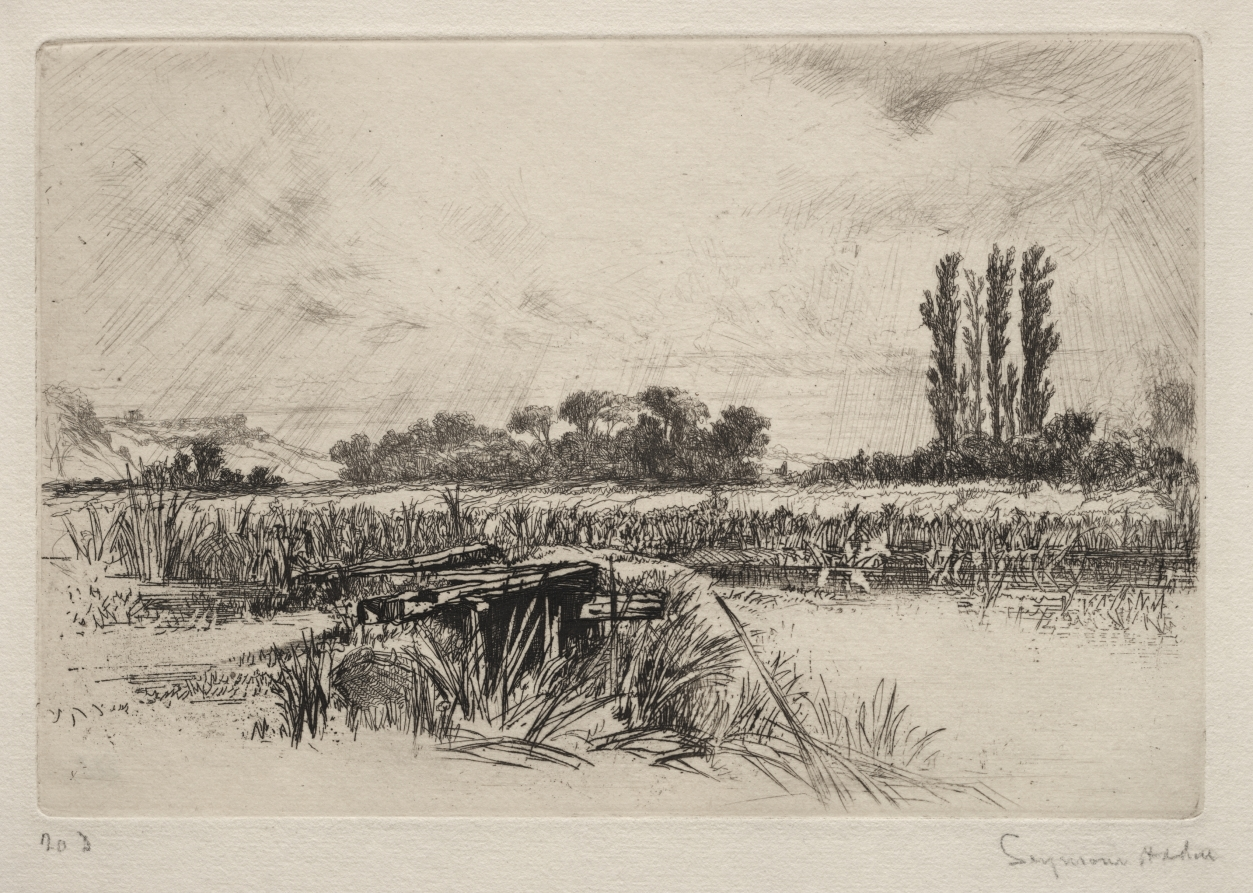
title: Water Meadow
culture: England, 19th century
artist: Francis Seymour Haden (British, 1818–1910)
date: 1859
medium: etching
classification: Print